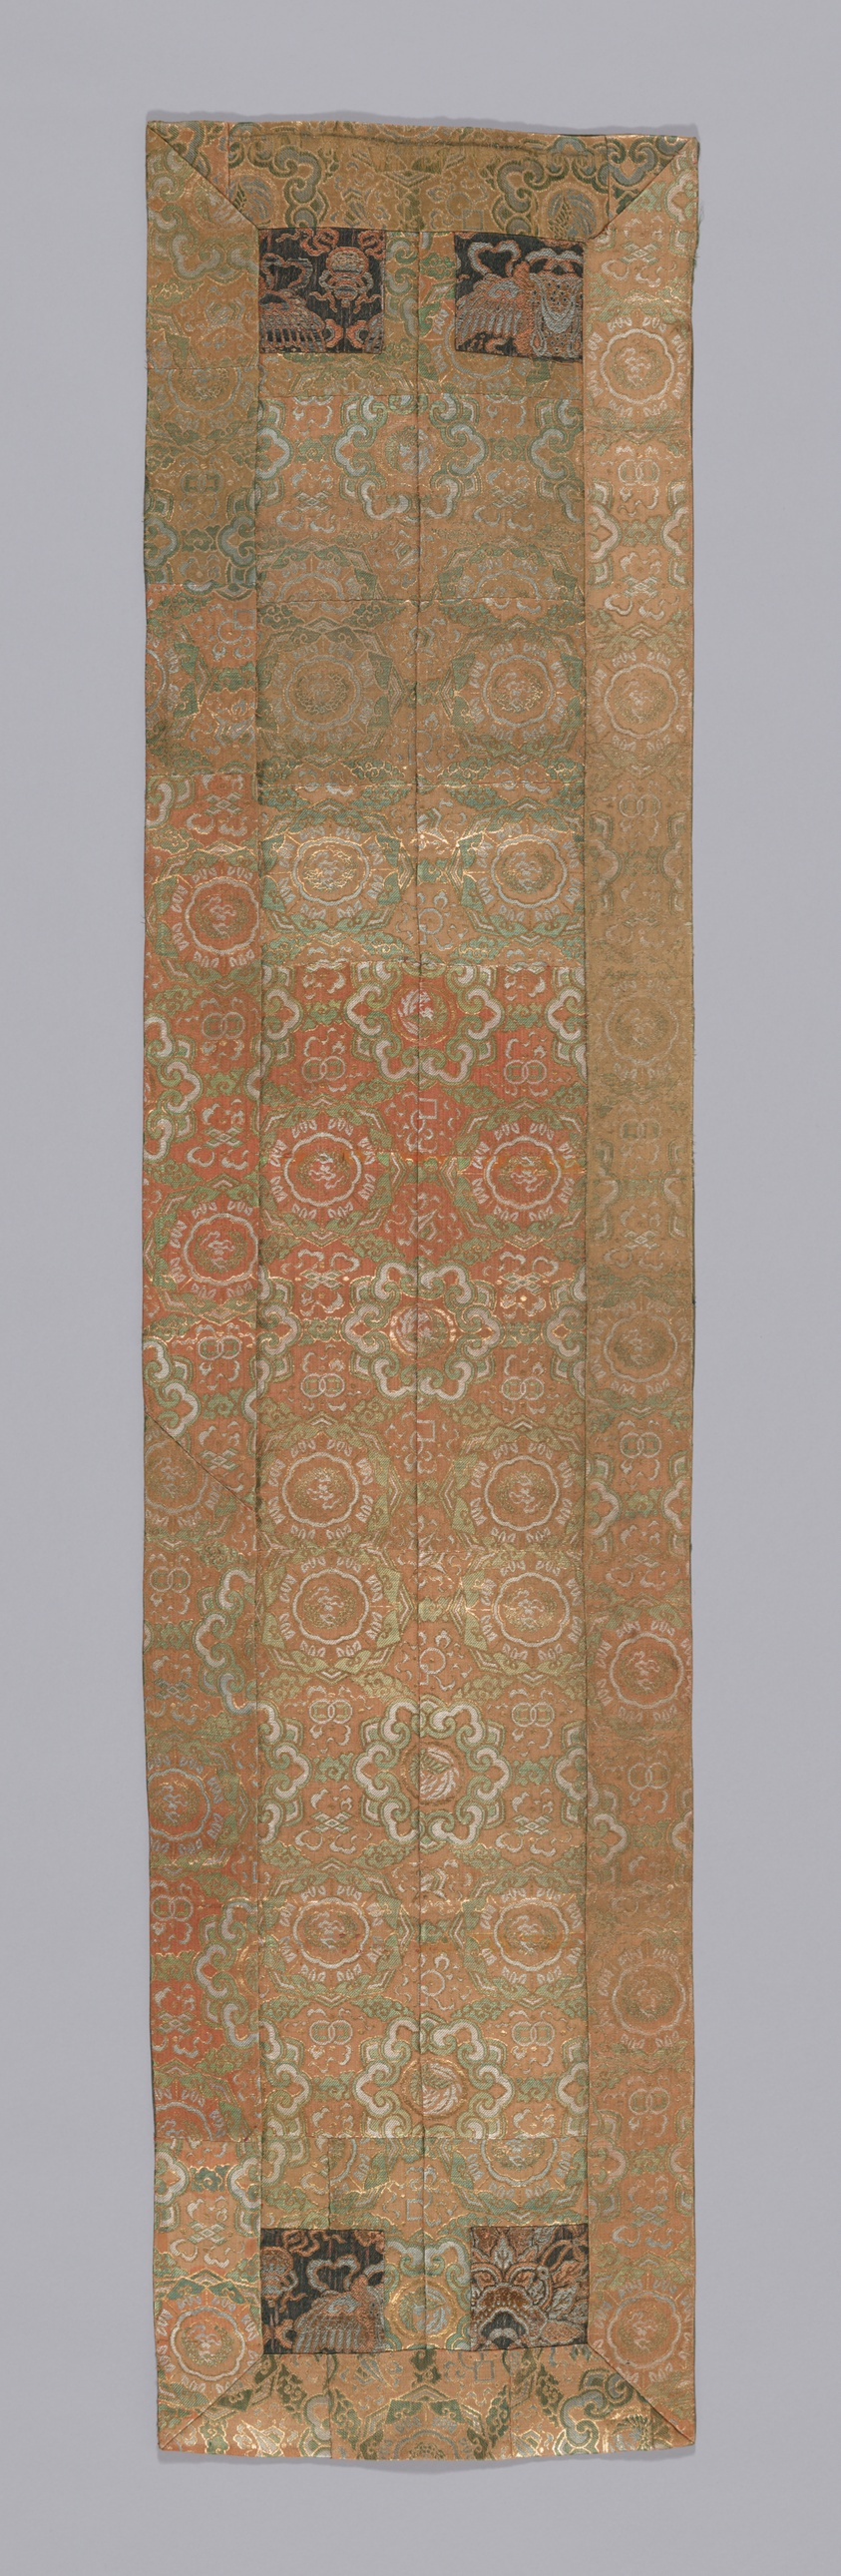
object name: Textile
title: Ôhi (Stole)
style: Japanism, late edo, meiji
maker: Japan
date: late Edo period (1789–1868)/ Meiji period (1868–1912), 19th century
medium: brocaded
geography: Japan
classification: textile; weaving